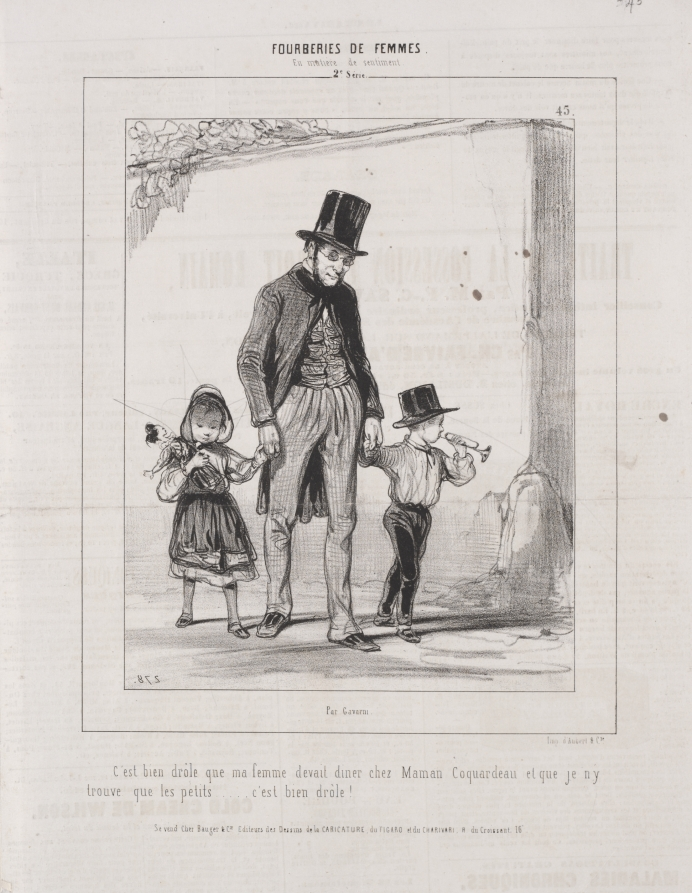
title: Fourberies de Femmes: En matière de sentiment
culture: France, 19th century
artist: Paul Gavarni (French, 1804–1866)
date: 1842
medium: lithograph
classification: Print